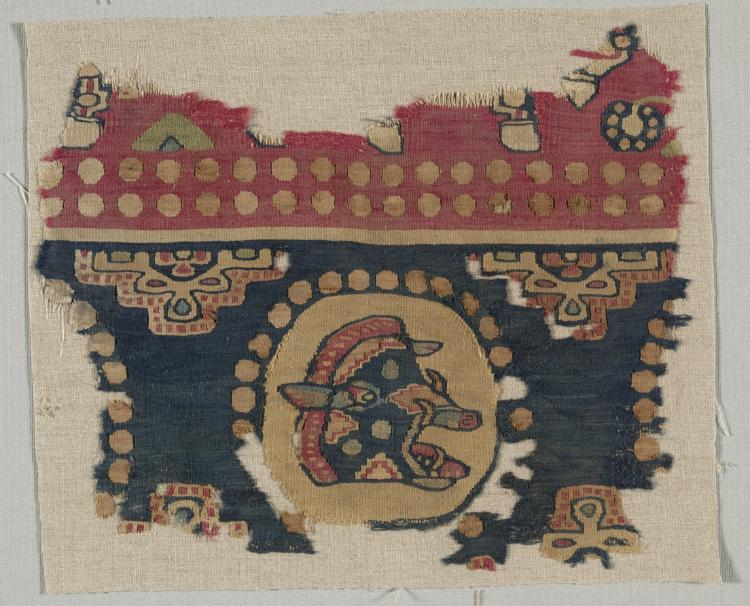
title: Hanging fragment with boar head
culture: Iran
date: 600s–early 700s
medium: Wool and linen: tapestry weave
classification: Textile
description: This fragment preserves parts of two distinct designs. In the lower section, a boar's head is framed by a pearl roundel; to left and right are fragments of two other roundels, and in the spandrels are segments of stylized flowers. In the field above are four feet of what must have been a rather large-scale horse standing in a meadow of flowers of which only fragments remain. A fifth hoof, turned in the opposite direction, indicates that originally the composition included a pair of horses addorsed. A double row of pearls occupies the spaces beneath the horses' feet, and a narrow plain band separates this field from the one below.